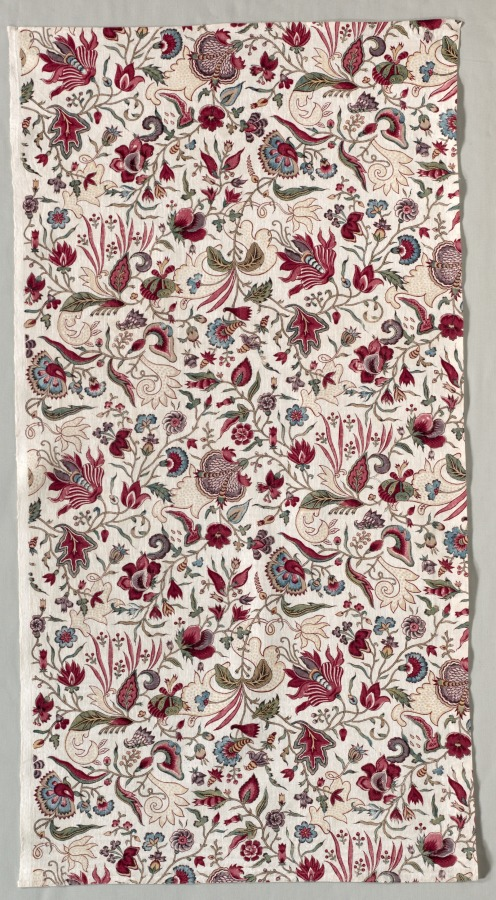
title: Fragment of a Quilted Skirt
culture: England, late 18th century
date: c. 1785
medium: woodblock print on cotton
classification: Textile